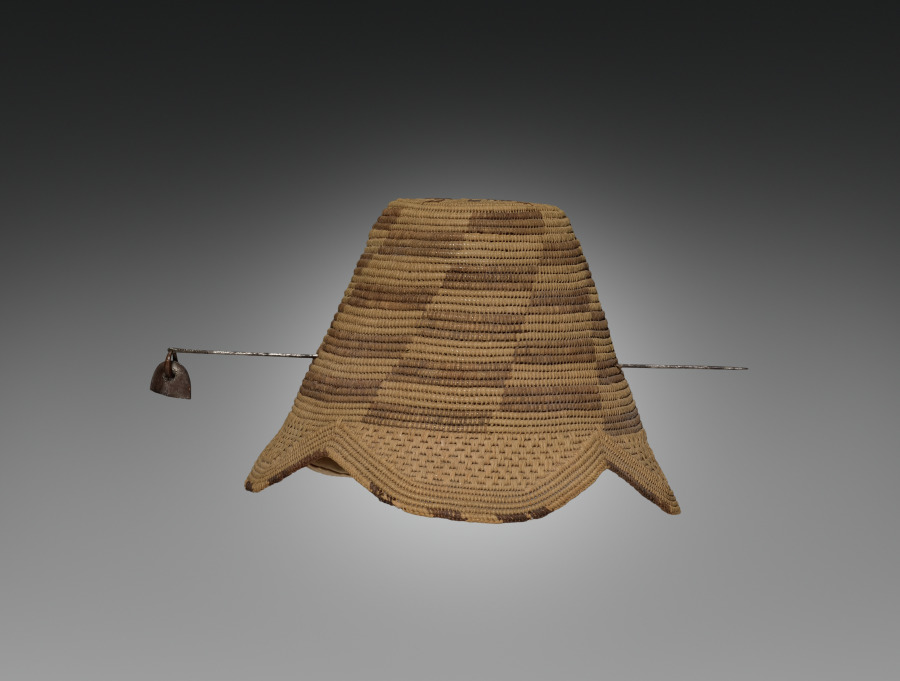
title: Hat (laket) with Pin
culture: Africa, Central Africa, Democratic Republic of the Congo, Kuba-style maker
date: Early 1900s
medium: Raffia, dye, and metal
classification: Garment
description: Titled Kuba men and prominent women wear the laket, a small ornate dome-shaped hat. An essential fashion item of adult men in good social standing, it focuses special attention on the head as a significant marker of individual identity, ethnic affiliation, status, and role in society. This prestige object is secured on the crown of the head with a nine-and-a-half-inch metal pin that pierces through the hat onto a clump of hair. The laket is made from raffia palm fiber coiled into threads and woven in two alternating patterns and contrasting light and dark (dyed) wefts. There are two examples of the laket: the plain type with the flat top, and the more elaborate type called the laket mishiing.